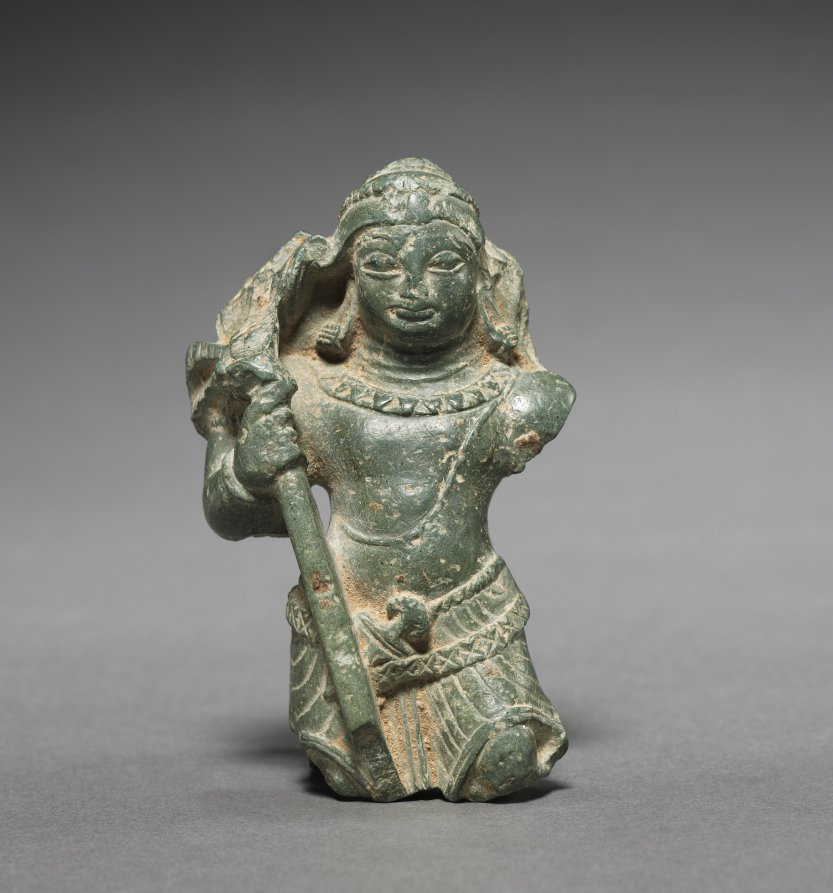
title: Karttikeya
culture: India, Kashmir, c. 5th Century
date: 400s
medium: stone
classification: Sculpture